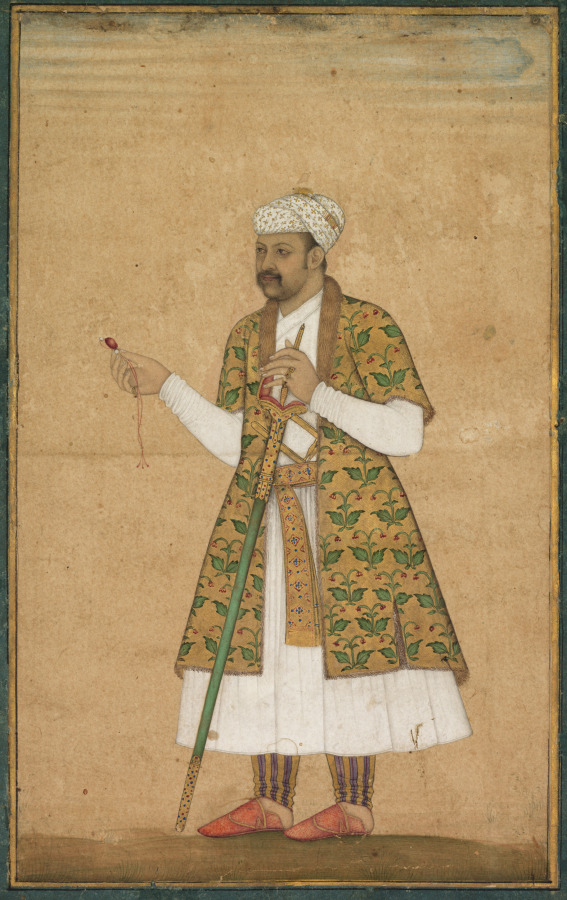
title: A Courtier, Possibly Khan Alam, Holding a Spinel and a Deccan Sword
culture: Mughal India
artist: attributed to Govardhan (Indian, active c.1596–1645)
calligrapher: Abd al-Rahim, the Anbarin-Qalam (Indian, active c. 1590–1630)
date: c. 1605–1610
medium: gum tempera, ink, and gold on paper, text on verso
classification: Painting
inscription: Verso: A tahshiyya (marginal addendum) in rhymed prose from the Gulistan (Rose Garden) of Sa‘di (Persian, 1210–1291) and the Nafahat al-Uns (Breaths of Fellowship) of Abd al-Rahman Jami (Persian, 1414–1492), c. 1605, Abd al-Rahim, the Anbarin-Qalam (Indian, active c. 1590–1630), Mughal court; In nast’aliq script: O Lord of the all dominions Praise and thanks to God—may he be honored and glorified!—whose worship brings one closer to him and giving thanks [to him] increases his bounty. [Each breath] that one inhales, prolongs life, and when exhaled a rejuvenation of the soul. Thus each breath contains two blessings, and on each blessing gratitude is due. Who is able, by word or deed, to fulfill the task of paying him due thanks? It is more apt for his slaves to seek at the Divine court pardon for their shortcomings, for what truly is worth his lordship none can render adequately. Persian verses from the Nafahat al-uns quoting a poem by the mystic Sheikh Ruzbihan of Shiraz (Persian, 1128–1209), in nast’aliq script: That which has not been visible to the eye of time; That which has not been audible to the ears of the earth; Has manifested itself in the clay of my being. Come at once and see it in my clay.This page has been written as marginalia to the book Mir’at al-quds [Mirror of Holiness],written by the wretched Abd al-Rahim Anbarin-Qalam, may God forgive his sins.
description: According to Akbar's court historian, the emperor ordered likenesses to be taken of the grandees of his realm. "An immense album was thus formed: those that have passed away have received a new life, and those who are still alive have immortality promised them." Akbar's son and successor, Jahangir (reigned 1605-27), continued the tradition of commissioning works of lifelike portraiture for inclusion in imperial albums. This courtier wears an opulent fur-trimmed, fringed velvet coat over his belted white tunic and striped pants-the typical Mughal dress derived from their roots among the nomadic horse-riding people of Central Asia. The artist has reveled in creating the soft textures of the facial hair, fur and fabrics. He holds a ruby-like gemstone called a spinel, which was prized among the Mughals for its talismanic properties of protection during battle.